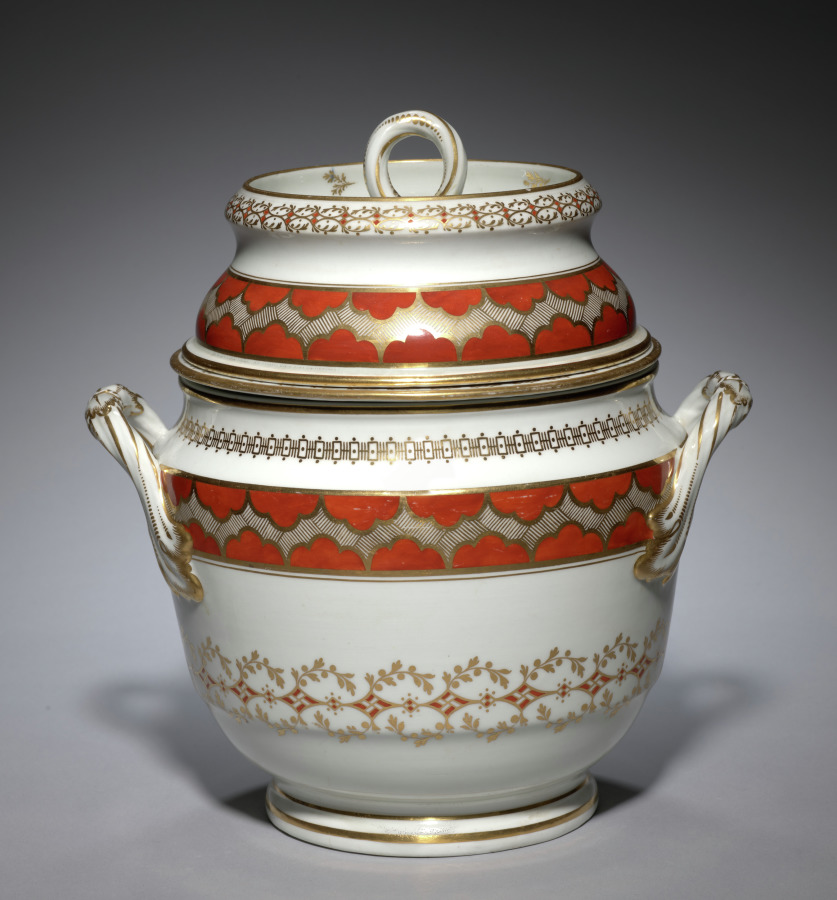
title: Ice Pail (2 of 2)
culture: England, late 18th-early 19th Century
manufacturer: Flight & Barr (British)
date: c. 1792–1804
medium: porcelain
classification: Ceramic